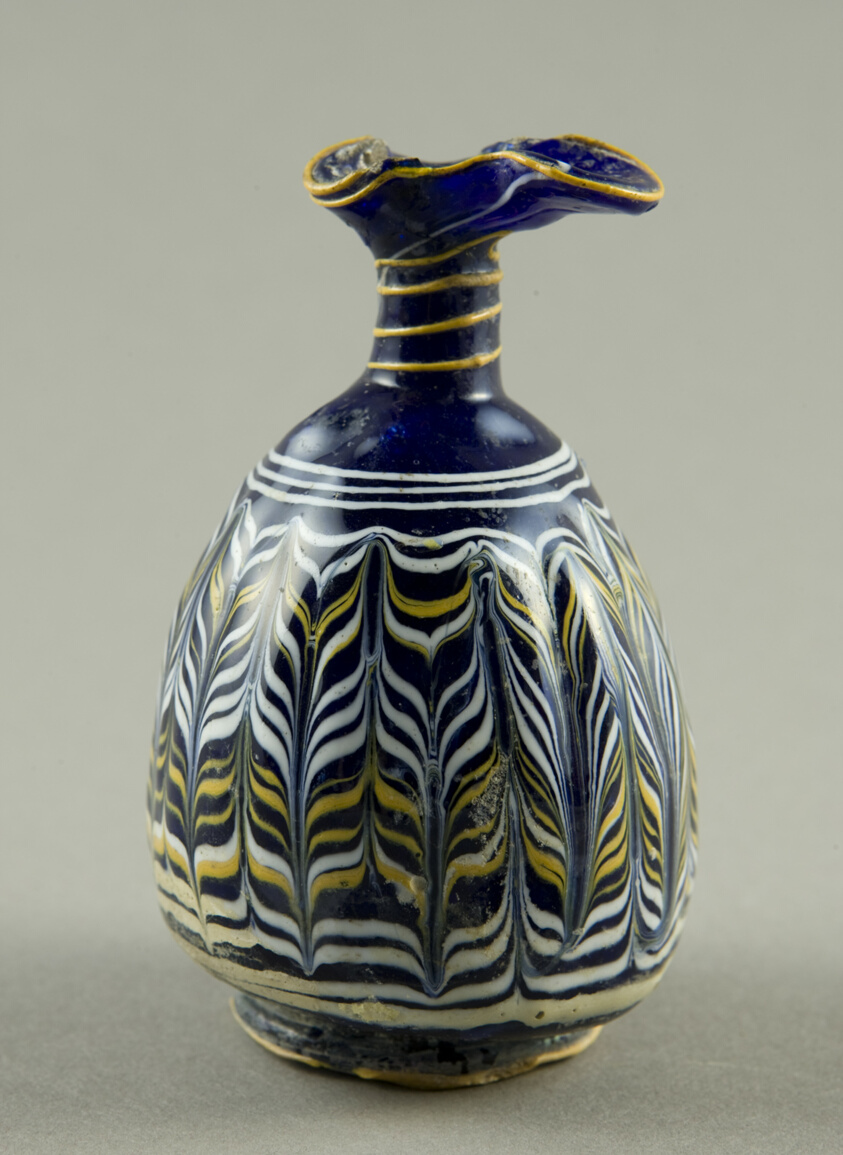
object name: Vessel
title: Pitcher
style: late period (egyptian)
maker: Eastern Mediterranean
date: 4th-3rd century BCE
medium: Glass, core-formed technique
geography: Egypt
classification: pitcher (vessel); glass; vessel; ancient art